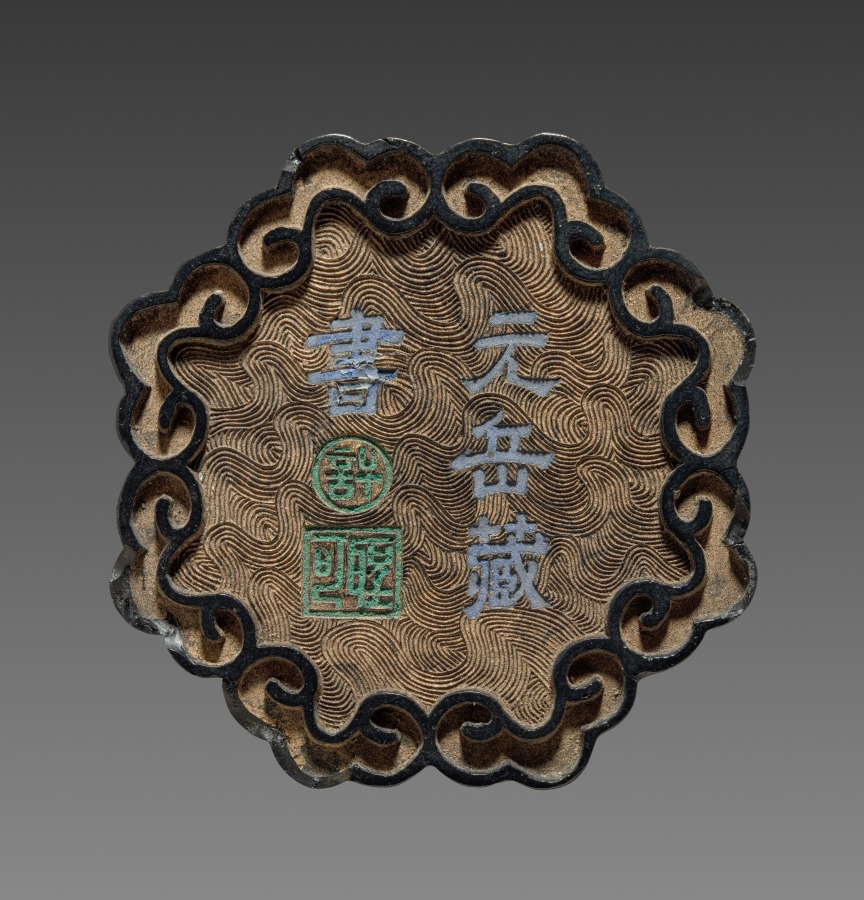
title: Ink Cake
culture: China, Qing dynasty (1644-1911)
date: 19th Century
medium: ink cake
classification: Miscellaneous